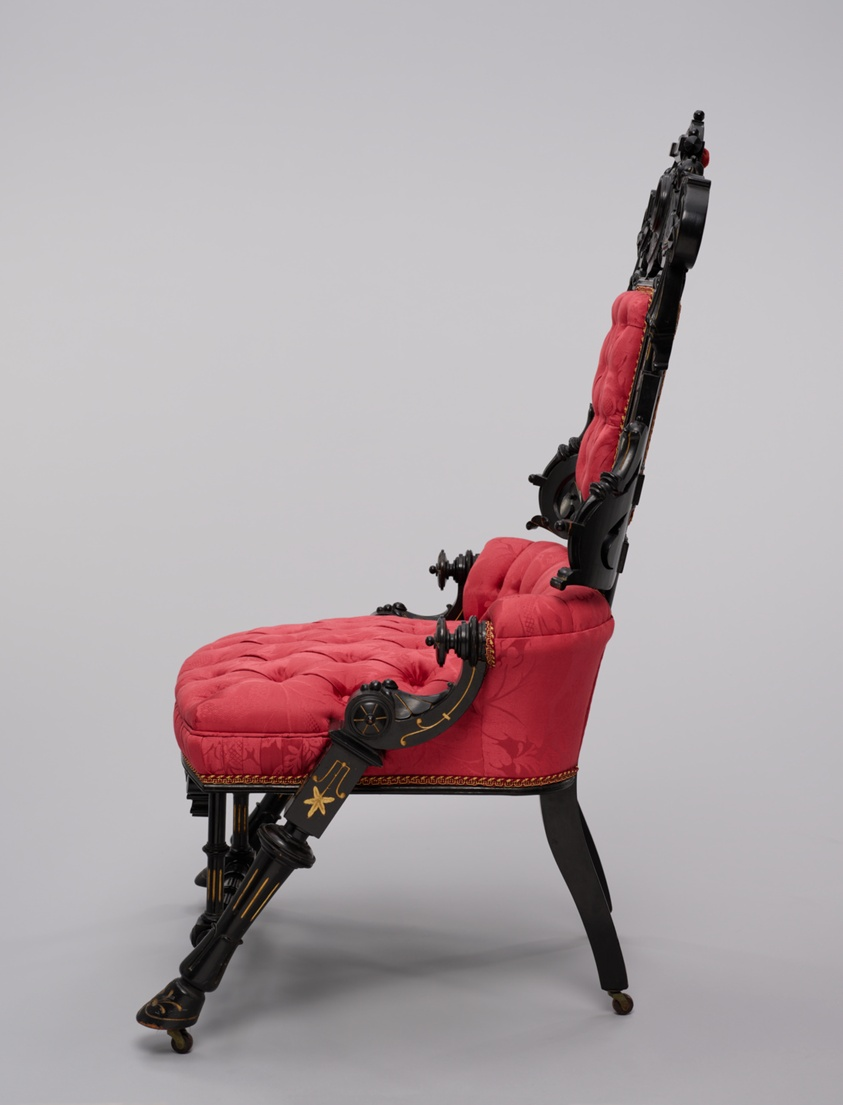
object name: Furniture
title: Armchair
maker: George Jakob Hunzinger (American, born Germany, 1835–1898)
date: About 1869; patented in 1869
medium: Ebonized walnut with gilt decoration and upholstery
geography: New York City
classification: seating; furniture; american decorative arts; american arts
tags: furniture